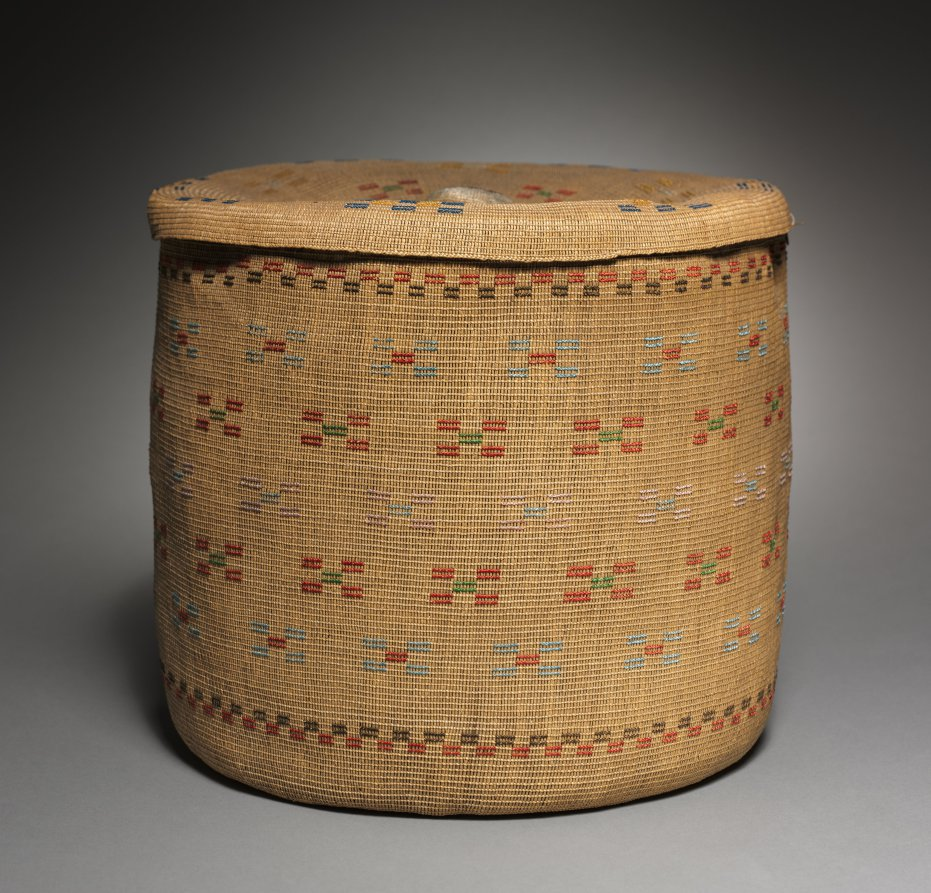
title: Covered Twined Cylindrical Basket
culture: Arctic. Aleut (Attu), late 19th-early 20th century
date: late 1800s–early 1900s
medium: twined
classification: Basketry